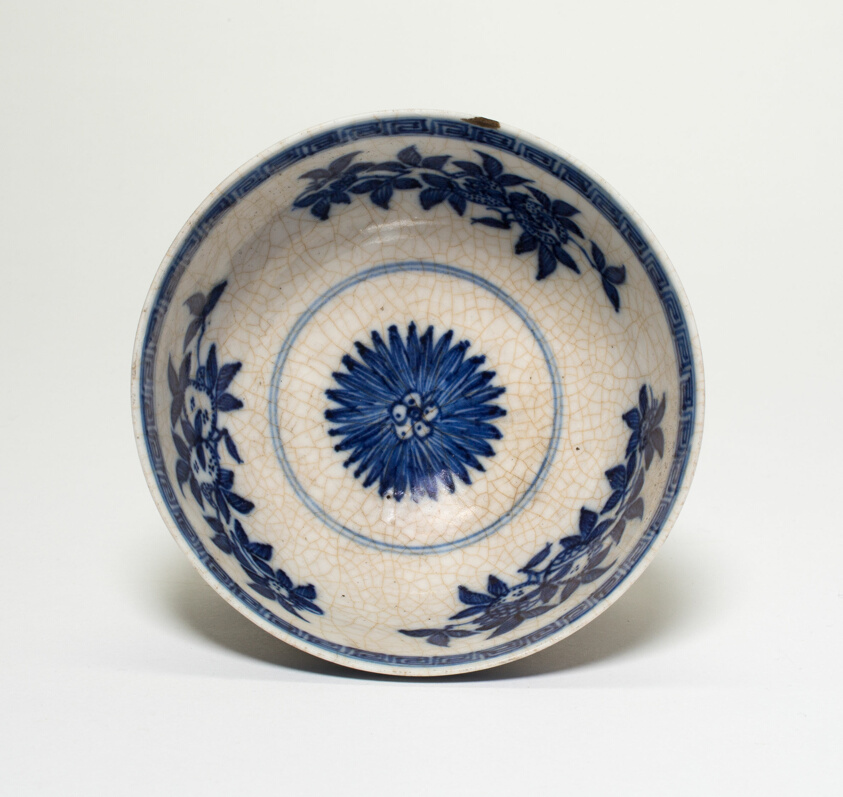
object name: Vessel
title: Bowl with Sprays of Pomegranate and Peaches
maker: China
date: Qing dynasty (1644–1911), Yongzheng period (1723–1735)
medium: Porcelain painted in underglaze blue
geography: China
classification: porcelain; asian art; ceramics